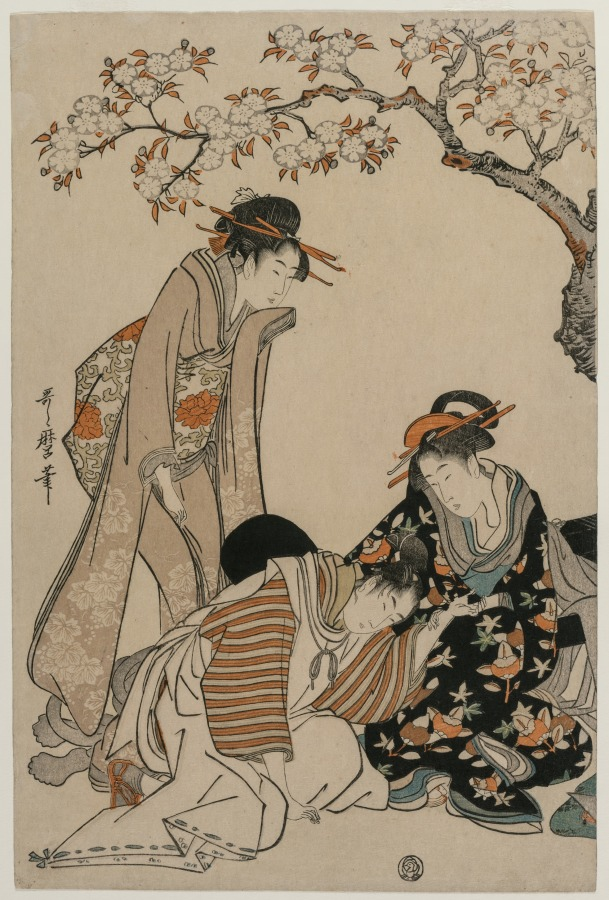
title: Parody of an Imperial Carriage Scene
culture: Japan, Edo period (1615–1868)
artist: Kitagawa Utamaro (Japanese, c. 1754–1806)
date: c. 1798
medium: color woodblock print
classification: Print